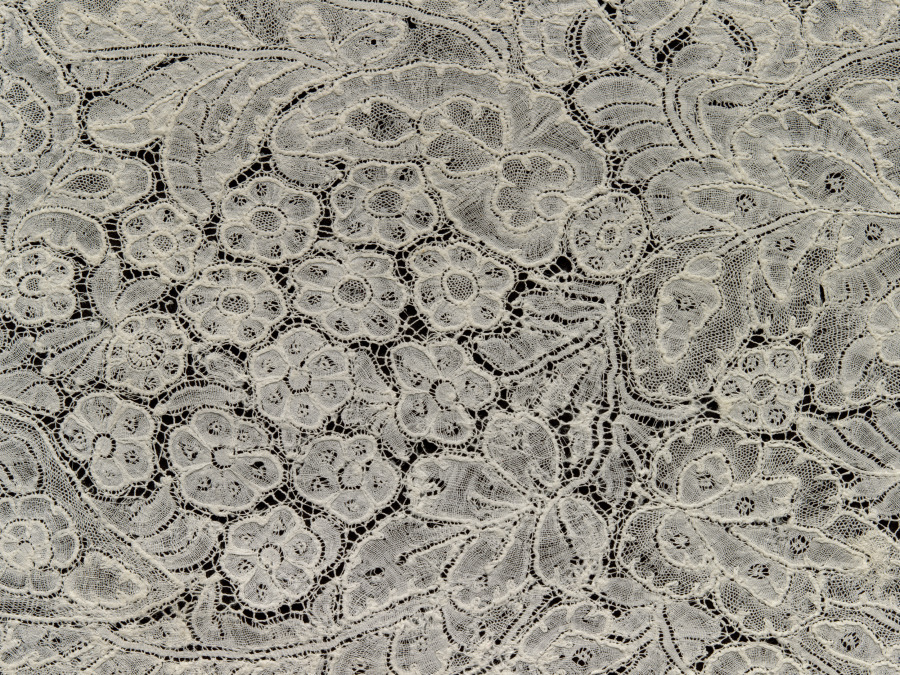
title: Lace Garniture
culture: Flanders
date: 1700s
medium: Linen: bobbin lace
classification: Lace